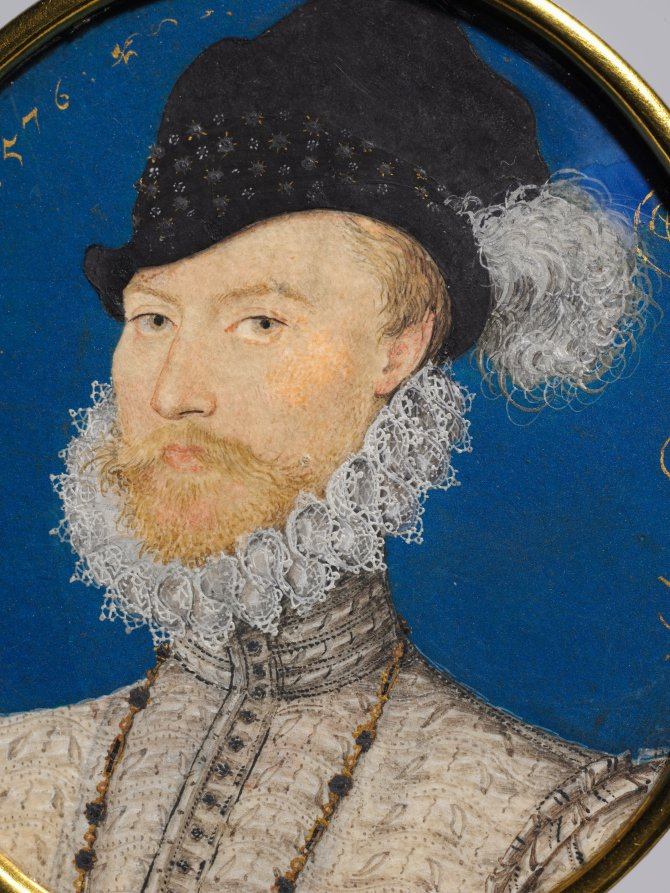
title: Portrait of Charles Howard, 2nd Baron Howard of Effingham, later 1st Earl of Nottingham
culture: England, 16th century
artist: Nicholas Hilliard (English, c. 1547–1619)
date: 1576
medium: watercolor on vellum in a gilt metal frame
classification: Portrait Miniature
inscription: inscribed from left: Ano, Dm. 1576: / AEtatis Suae; 39.